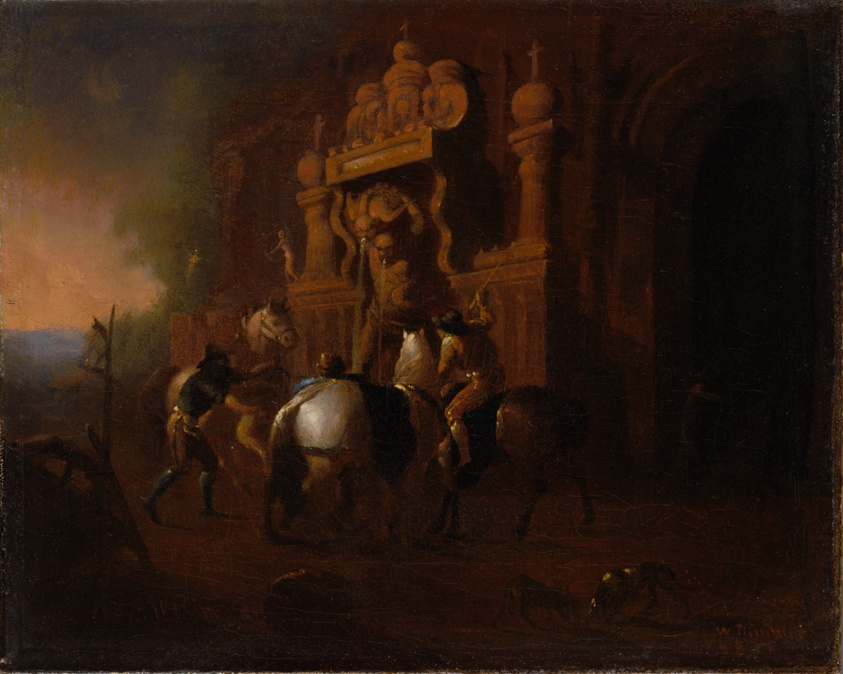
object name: Painting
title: Horses at a Fountain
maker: William Rimmer (American, born England, 1816–1879)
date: 1856–57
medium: Oil on canvas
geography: United States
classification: painting; american arts